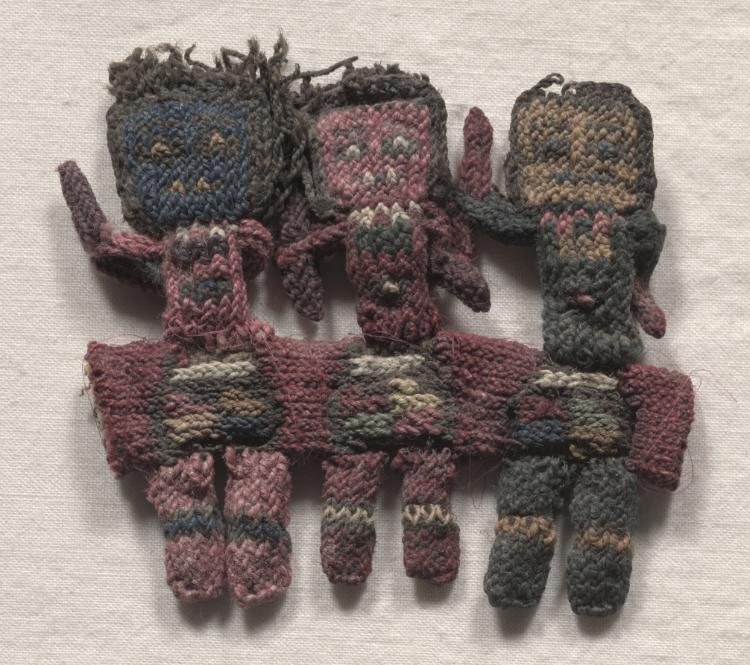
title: Border Fragment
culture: Peru, South Coast, Nasca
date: 100 BCE–700 CE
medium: embroidery in polychrome wools on cotton foundation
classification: Embroidery